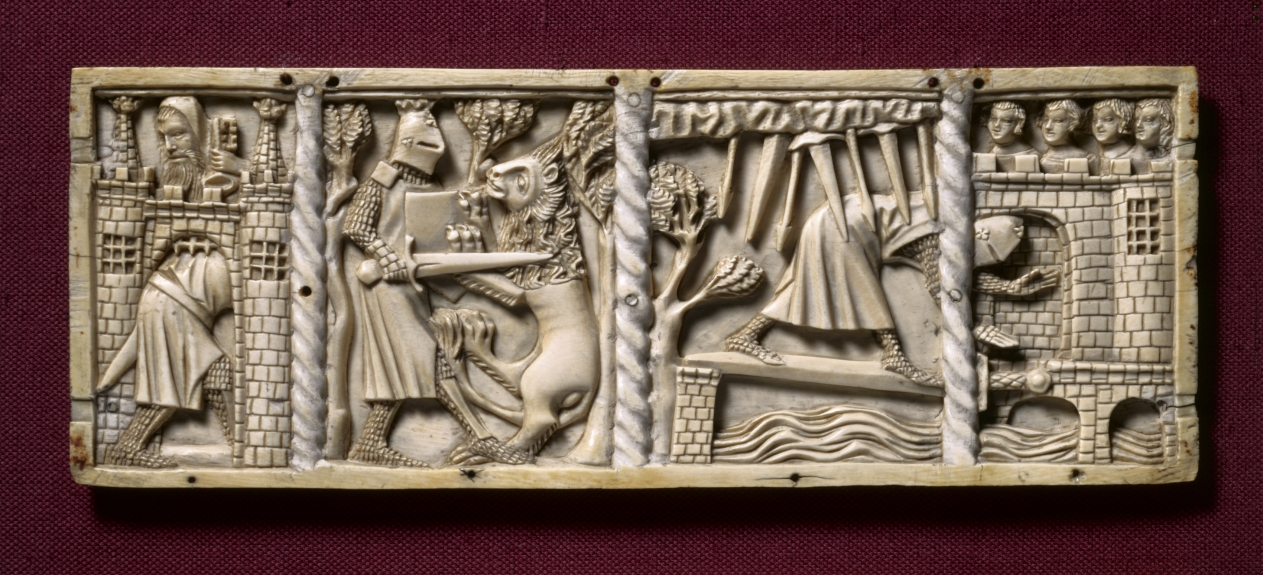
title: Set of Three Panels from a Casket with Scenes from Courtly Romances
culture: France, Lorraine?, Gothic period, 14th century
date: c. 1330–50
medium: ivory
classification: Ivory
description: Among the most lavish and deluxe products of French ivory workshops of the 1300s were large caskets carved with elaborate scenes drawn from courtly romances. The panels shown here come from such a casket. The largest panel (center) once formed the lid and depicts a tournament, the most splendid and romantic of knightly activities. Just to the right is a favorite allegory of chivalric love: knights assaulting the castle of love. The two side panels depict other scenes such as the fountain of youth, Sir Gawain and the Lion, and Lancelot crossing the sword bridge. These images suggesting chivalry, fertility, virginity, youth, and an idealized courtly love likely derive from manuscripts including the Roman de la Rose and the poems of Chrétien de Troyes. Such texts were often found within the libraries of the aristocracy, so the casket’s symbolic images would have been readily understood. Such caskets may have originally been gifts between a man and a woman. The expense of the material, ivory, suggests they were produced for an elite, aristocratic clientele.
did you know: In the center panel two knights in mail surcoats and helms joust here with blunted lances "for courtesy," a version of the joust known as the Joust of Peace.